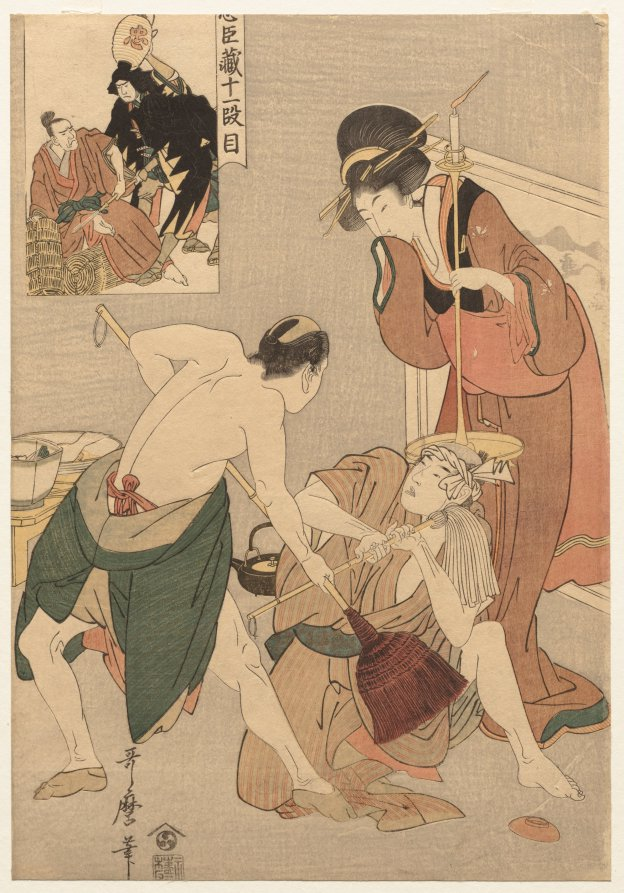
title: Chushingura: Act XI of The Storehouse of Loyalty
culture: Japan, Edo period (1615–1868)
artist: Kitagawa Utamaro (Japanese, c. 1754–1806)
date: late 1790s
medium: color woodblock print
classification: Print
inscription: Signature: Utamaro hitsu.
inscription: Publisher: Nishimuraya Yohachi (Eiju han, emblem).